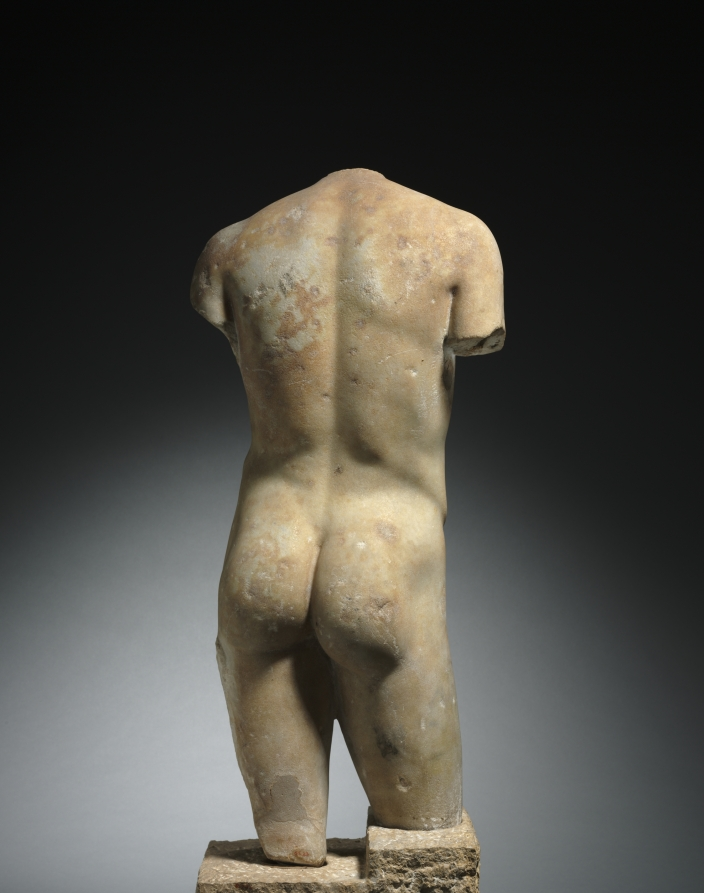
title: Torso of a Youth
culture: Greece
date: c. 150–100 BCE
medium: marble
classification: Sculpture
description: The exceptional workmanship suggests that this sculpture was carved by a Greek sculptor. Its incomplete state of preservation makes precise identification difficult, but it was most likely an Apollo or Dionysos, modeled in the soft, somewhat effeminate style of Praxiteles. The museum’s Apollo Sauroktonos is a useful parallel. The two drill holes in the upper chest are ancient and were possibly used to support separate long tresses of hair. The sculpture may well be a copy of a fourth-century original.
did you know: It was common practice in the 1700s and 1800s to attach new heads or limbs to fragmented ancient statues like this one.